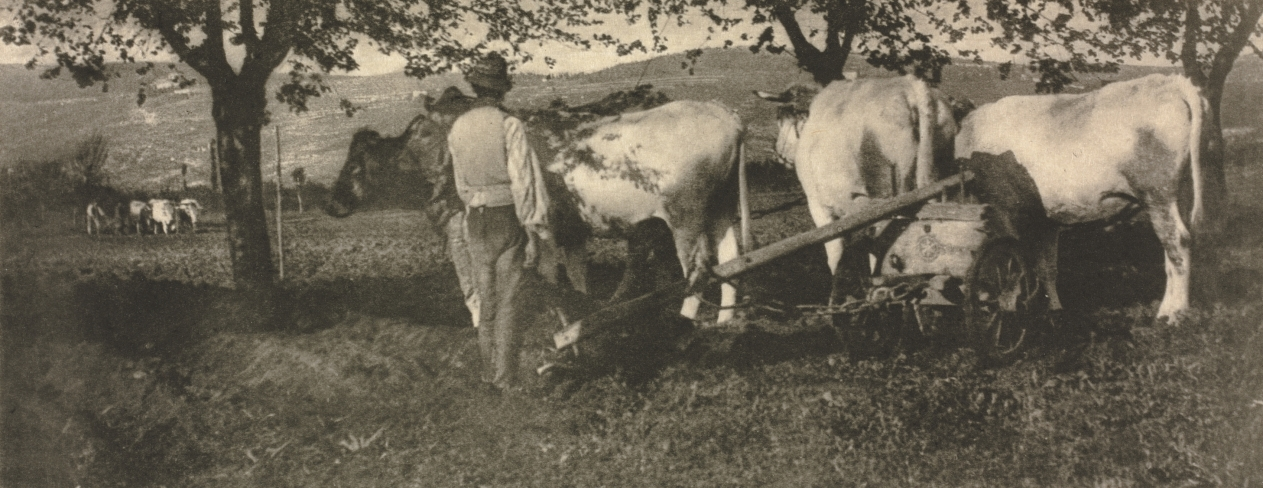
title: Camera Work: Ploughing Team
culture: England, 20th century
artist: J. Craig Annan (British, 1864–1946)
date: 1907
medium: photogravure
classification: Bound Volume